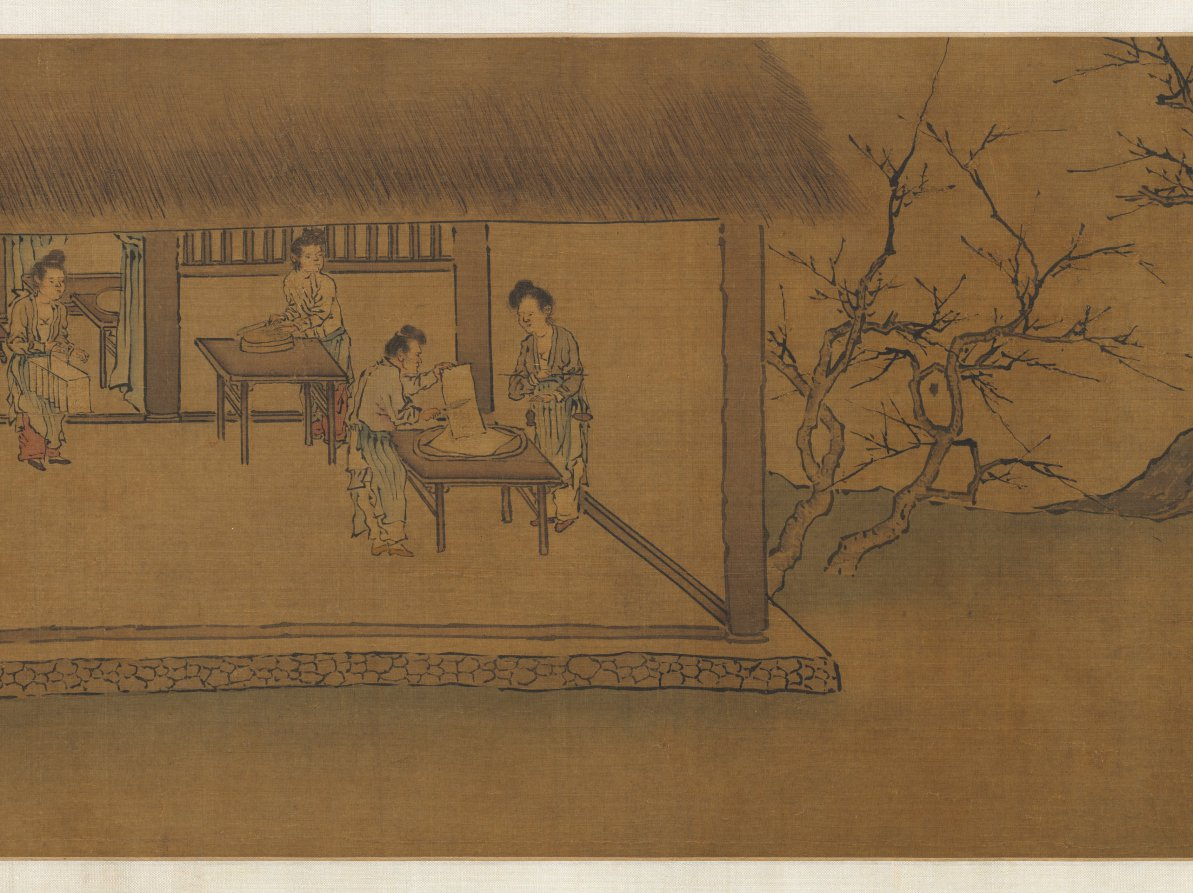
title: Sericulture (The Process of Making Silk)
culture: China, Southern Song dynasty (1127-1279)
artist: attributed to Liang Kai (Chinese, mid-1100s–early 1200s)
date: early 1200s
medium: Handscroll; ink and color on silk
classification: Painting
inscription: 3 colophons and 7 seals of Ch'eng Ch'i (20th c.).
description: By the Southern Song period, the economic center of the silk industry had shifted to the lower Yangzi delta, while the north continued to be troubled by wars. Divided into three sections, the handscroll illustrates 14 steps in the process of making silk, from the raising of silkworms to the weaving of silk cloth. The scroll’s scenes follow the illustrations of Lou Shou’s (1090–1162) Pictures of Tilling and Weaving (gengzhi tu), the first recorded painting of this genre, which was conceived in Hangzhou around 1145. However, in the Cleveland painting the artist groups several scenes of sericulture together under the roof of an open structure.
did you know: The painting is attributed to Liang Kai, a court artist active from about 1201 to 1204 at the Imperial Painting Academy in the city of Hangzhou, a major silk weaving center from that time to the present day.